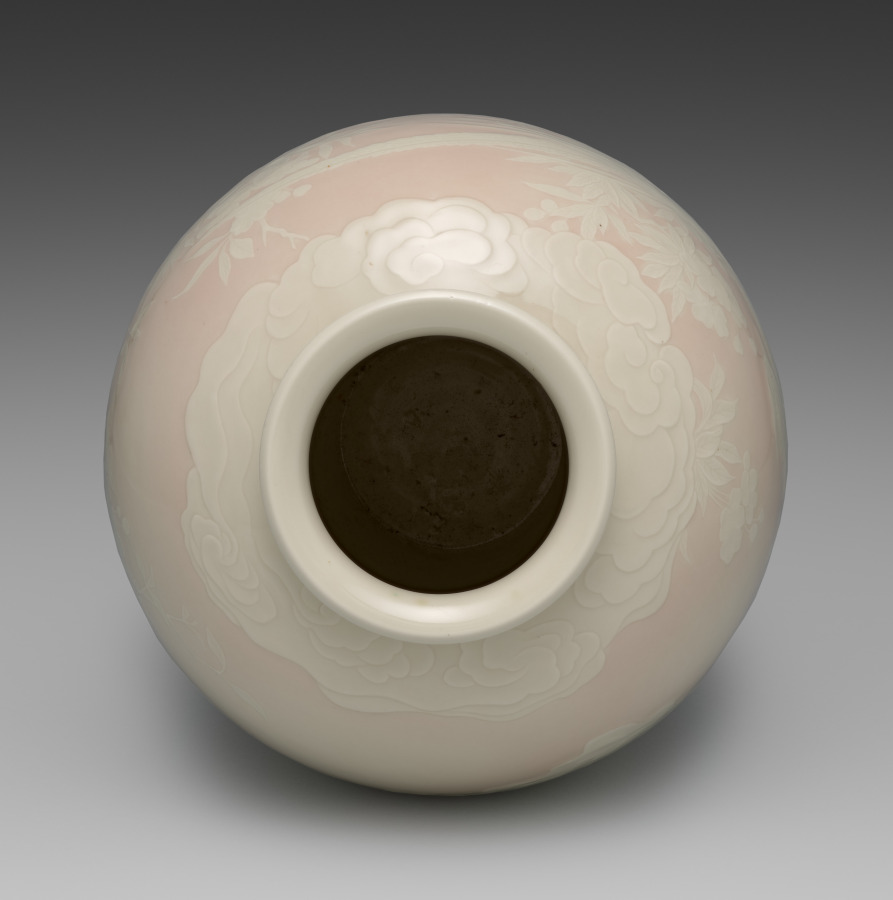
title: Pheasants in Cherry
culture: Japan, Meiji period (1868–1912)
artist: Seifū Yohei III (Japanese, 1851–1914)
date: 1900–1914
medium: Porcelain with molded and carved design, underglaze color, and cream glaze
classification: Ceramic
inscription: 大日本清風造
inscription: 清風製之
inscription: 清風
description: Like the design of Flower Vase with Phoenix in Paulownia (CMA 2022.199), the pair of pheasants in a dramatic landscape setting on this vase was created by adding clay to the surface of the clay body and then molding and carving it. Here, instead of a typical white clay, Yohei III has used an ivory clay. He then added gradated pink around the complex design, which with its multitude of cherry blossoms must have been painstaking to mask with precision. For the birds’ eyes, he added a touch of yellow. He then fired the vase with an allover translucent cream glaze. The resulting kanpakuji piece is one in which an academic subject long favored by painters of the Kano school for screen and sliding door paintings in important buildings, that of impressively sized birds within a scene of precipitous, angled rock faces and twisting trees, is made soft and ethereal while retaining a sense of gravitas.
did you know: The unusually large scale of this piece and the fact that he signed the base “Made by Seifū of Great Japan” also suggest that it was made for public display.